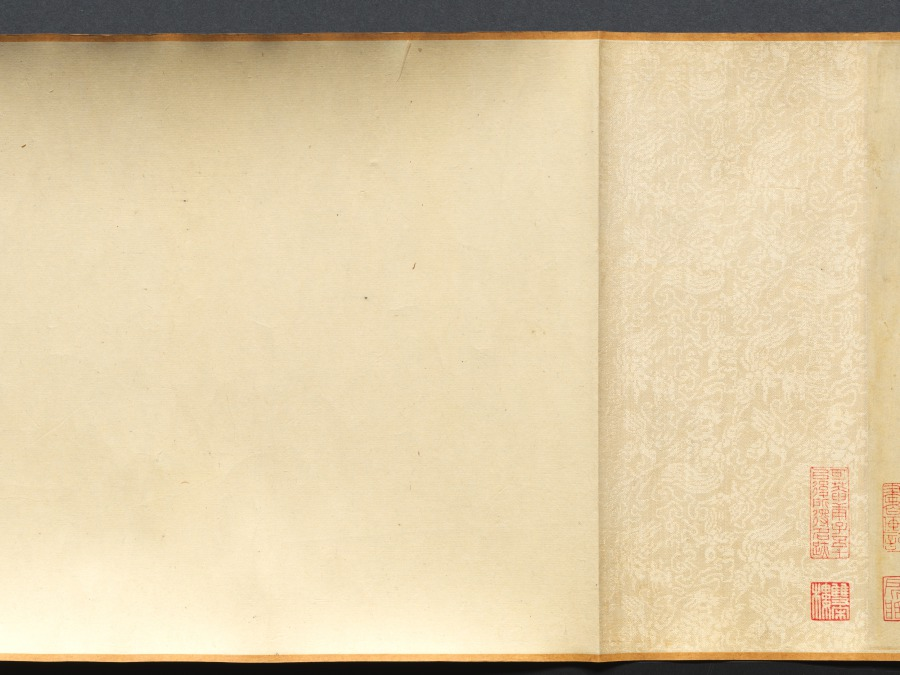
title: Flowers of Four Seasons, with Poems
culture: China, Ming dynasty (1368–1644)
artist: Wang Guxiang (Chinese, 1501–1568)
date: 1531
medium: handscroll; ink and light color on silk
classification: Painting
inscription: Artist's inscription, signature, and 15 seals. Ink Orchids. Sewn as pendants for the man of worth, swaying quiety, fragrance in the valley. [seal] Hsiao-chu ts'un Peony. Wiping his face, the young gentleman Ho [Ho Yen of Wei, Three Kingdoms] appears to have been powdered. His previous life was the perfume-stealing Han Shou [of Chin, 265–419 CE], the fragrance still lingers. [seal] Ts'un-wu chai. Flowering Crab Apple, New Bamboo. Shao-lin [Du Fu, 712–770] had to put down his brush. [Flowering Crab Apple]. Yü-k'o [Wen T'ung, d. 1079) in vain wrote poems about [Bamboo]. [seal] Yu-shih. Lotus Flowers. When she turns her head, half-hidden by a fan, and casts a glance, all the beautiful women become colorless. [seal] K'ang yüeh huai. Loquat. Ripeness in summer. [seal] Lu-chih. Pomegranate Flower. Whenever I remember you I will send my thoughts, but where have you gone--the [skirt] of pomegranate red? [seal] Wu-ho Sheng. Day Lily. Plant the day lily to forget sorrow. [seal] Yu-shih. Chrysanthemum. The untrammelled joy at the eastern fence. [seal] Lu-chih. Begonia. Comparing it to the beauties of Spring, and spreading them out as trimming for the stone steps. [seal] Yu-shih. Hibiscus. In recent years I have always enjoyed looking at flowers; instead of dark red I preferred pink ones. [seal] Jen-sheng i-lou. Narcissus, Camellia. The jade girdle left behind at Lo River. [Narcissus]. The precious pearls glitter before Spring. [Camellia]. [seal] Lu-chih. Heavenly Bamboo (Nandina domestica). A single branch in the wintry season. [seal] K'ang yüeh huai. Plum. Fragrant snow in the Lo-fou Mountains. [seal] Ts'un-wu chai. In the eleventh lunar month of the hsin-mao year of the Jiaqing era [1531], [I] imitated the boneless style of Yüan masters in sketching from life. Guxiang [seals] Yu-shih; Lu-chih. Translated by Wai-kam Ho/Lingyun Shih Liu (1980)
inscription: 2 colophons and 23 additional seals: 1 colophon dated 1632, and 2 seals of Li Jih-hua [Li Rihua] 李日華 (1565–1635); 1 colophon and 2 seals of Xiang Shengmo 項聖謨 (1597–1658); 3 seals of Liang Qingbiao 梁清標 (1620–1691); 6 seals of the Jiaqing 嘉慶 emperor (r. 1796–1820); 9 seals of Ch'eng Ch'i [Cheng Qi] 程琦 (1911–1988)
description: In this painting, flowers are loosely arranged by the seasons: narcissus and peony represent early spring; yellow loquat and lotus, summer; chrysanthemum, autumn; and the plum and evergreen bamboo, winter. The artist added to each flower a poetic line of calligraphy associating each plant with a historic or legendary figure. For example, the chrysanthemum, along with the line “The untrammeled joy at the eastern fence,” refers to the poet Tao Yuanming (died AD 427) who enjoyed chrysanthemums at the eastern fence in his garden. The scroll illustrates Wang Guxiang’s mastery of free brushwork, combining light monochrome ink with transparent colors. In his inscription, Wang says he used the “boneless” style without outlines as developed during the Yuan dynasty (1279–1368). Wang was a native of Changzhou, a city in southeast China known for its rich flora and fauna, and flower-and-bird painting tradition.